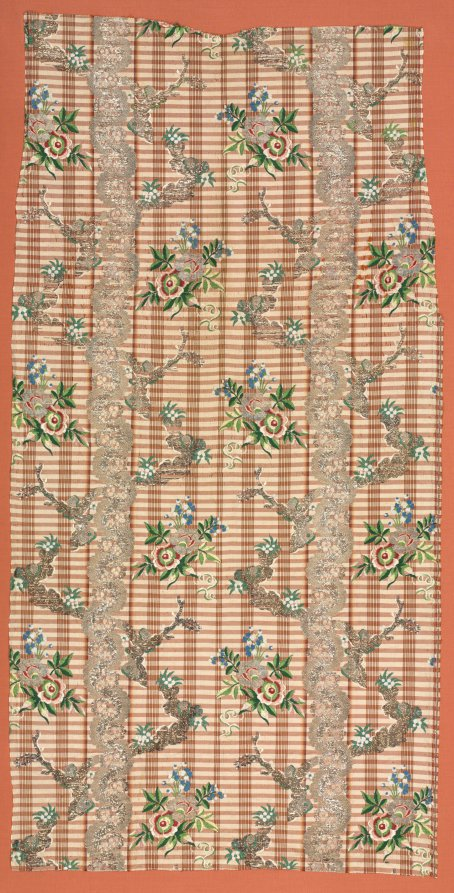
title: Length of Brocaded Silk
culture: France, 18th century, Period of Louis XVI (1774-1793)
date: 1774–1793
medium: brocade; silk and metal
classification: Textile